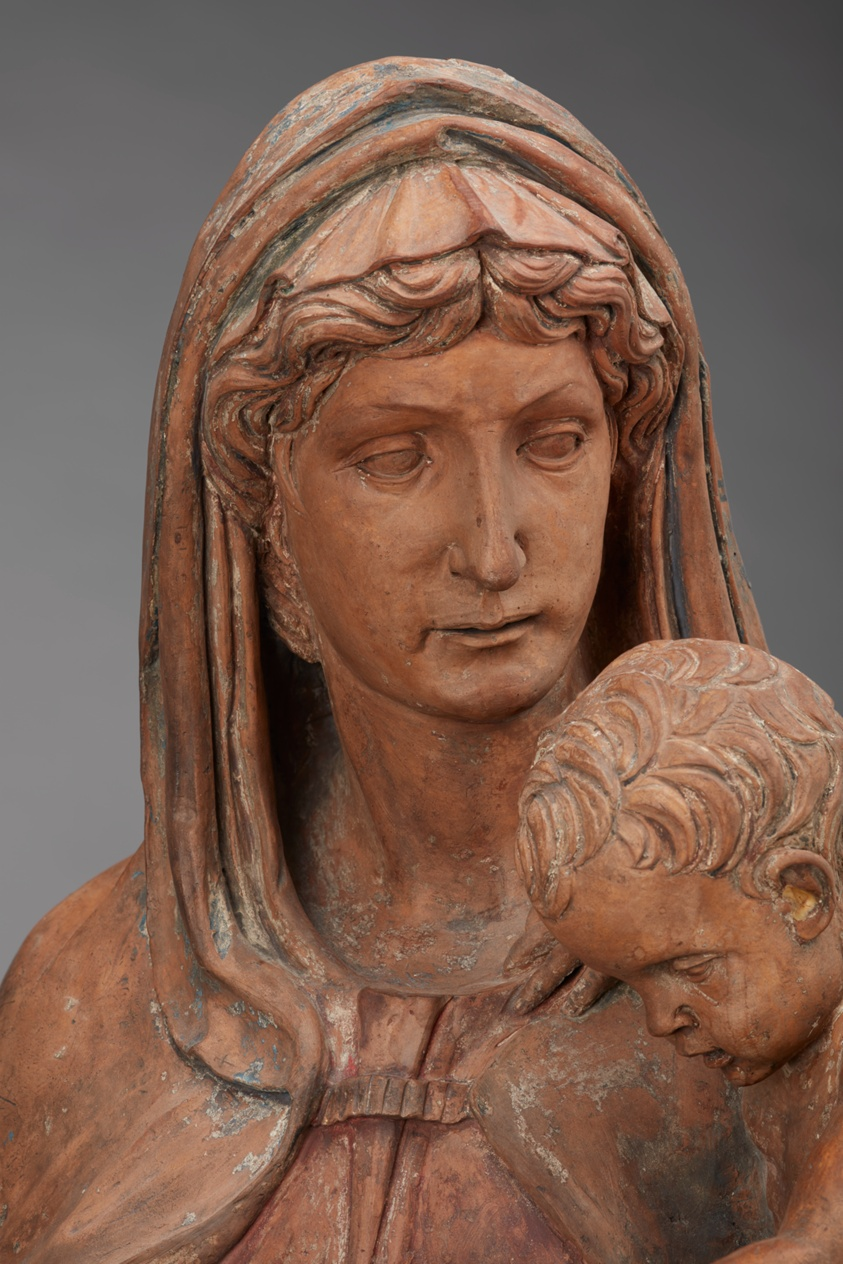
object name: Sculpture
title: Virgin and Child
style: sixteenth century, 16th Century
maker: Central Italian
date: c. 1500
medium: Pigmented terracotta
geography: Central Italy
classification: large scale; sculpture; Italian; terracotta (sculpture)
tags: Virgin and child/Madonna and child, Christianity, Christian subjects, religious figures, religious, religion, woman with children, woman, babies, child, mother and child, mother, Jesus, Virgin Mary